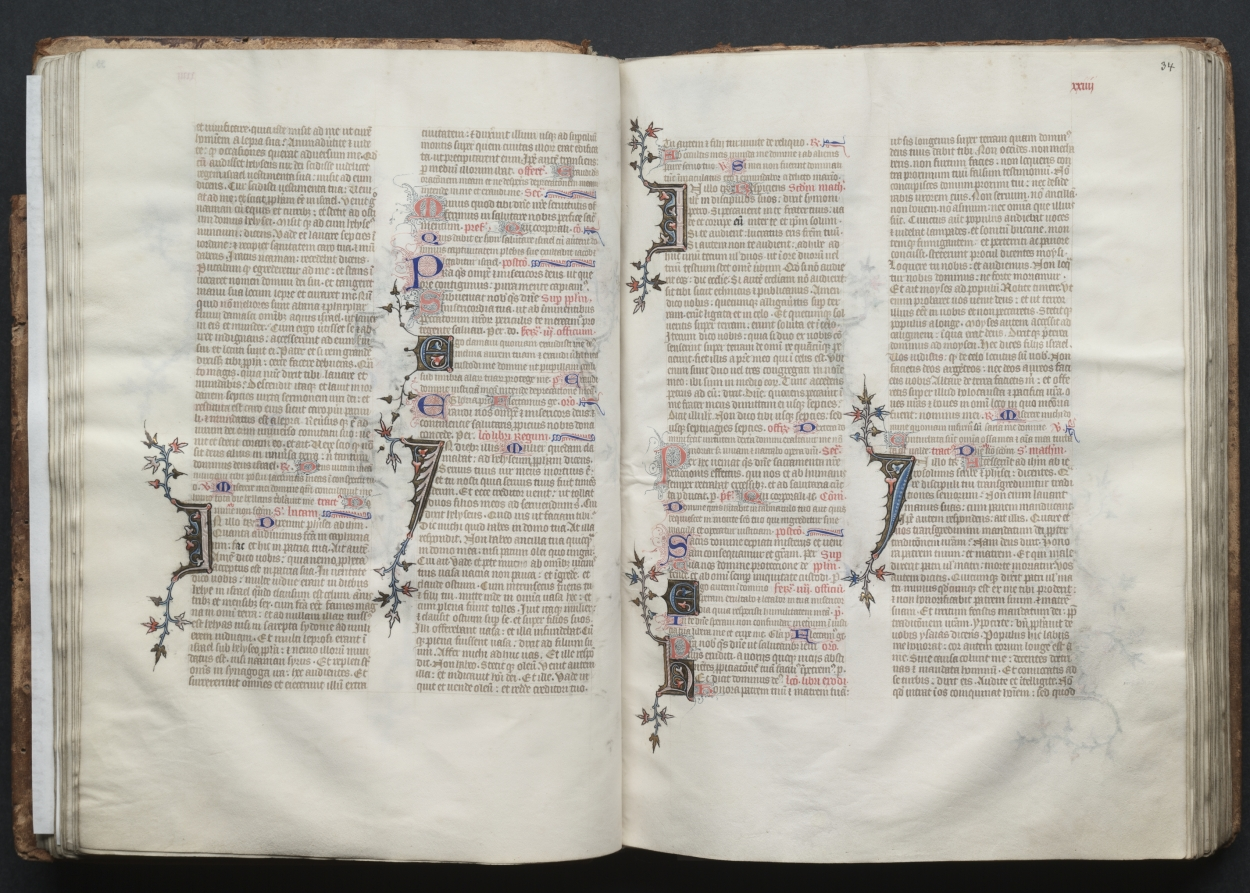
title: The Gotha Missal: Fol. 33v, Text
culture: France, Paris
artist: Master of the Boqueteaux (French)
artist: and Workshop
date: c. 1375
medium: ink, tempera, and gold on vellum; blind-tooled leather binding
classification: Bound Volume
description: The style and quality of this manuscript's decoration is typical of deluxe Parisian books made for aristocratic or royal patrons. Most of the book's decoration appears to be the work of the Master of the Boqueteaux, an artist active at the court of King Charles V (died 1380). His style was apparently shared by a number of book illuminators working in and around Paris. It is very possible that the Gotha Missal belonged to Charles V, but is not provable because the manuscript has no royal portraits and lacks a colophon. Given the book's magnificent decoration, however, it would seem that it was produced for a Valois prince, if not for the king himself. The manuscript receives its name from the German dukes of Gotha, its later owners.